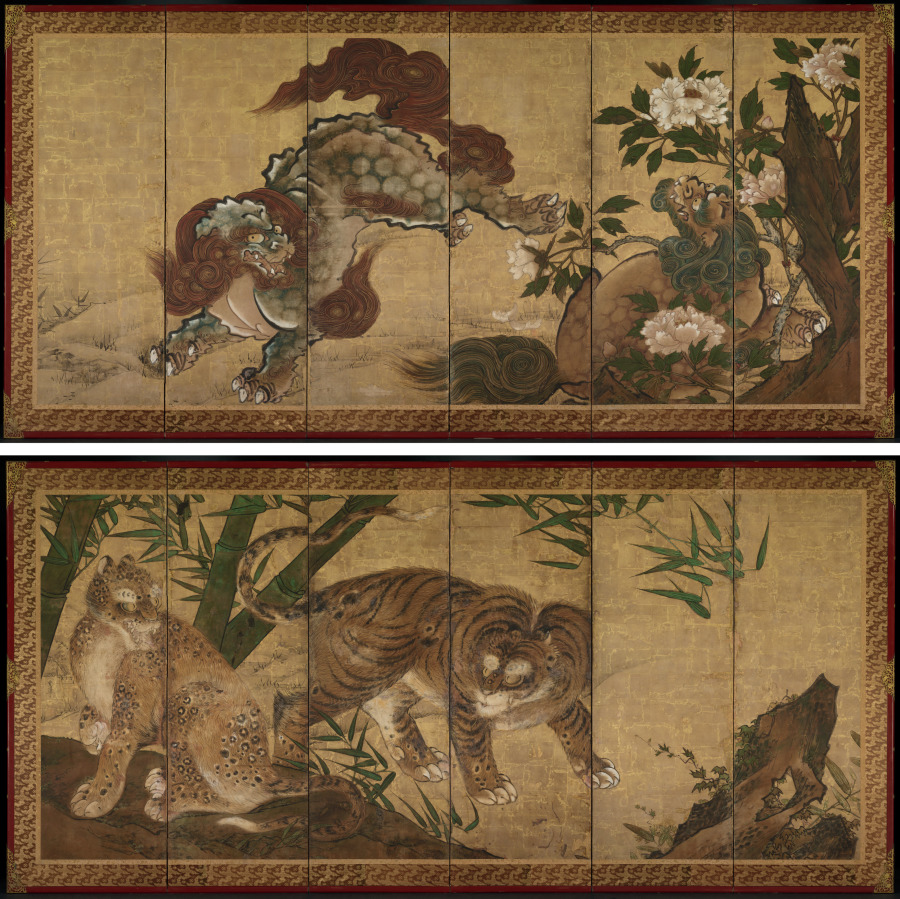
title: Lions and Tigers in Peony and Bamboo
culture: Japan, Edo period (1615–1868)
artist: Yamaguchi Sekkei (Japanese, 1644–1732)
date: 1668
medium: pair of six-panel folding screens; ink and color on gilded paper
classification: Painting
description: Sekkei lived and studied painting in Kyoto at the Kano school studio, the center of traditional painting activity in Japan since 1500. The use of gold foil as a backdrop for the frolicking animals served a practical as well as a decorative function. Because traditional Japanese rooms had no windows, interior lighting came from portable oil lamps and wax candles, whose effects were magnified by reflective surfaces.